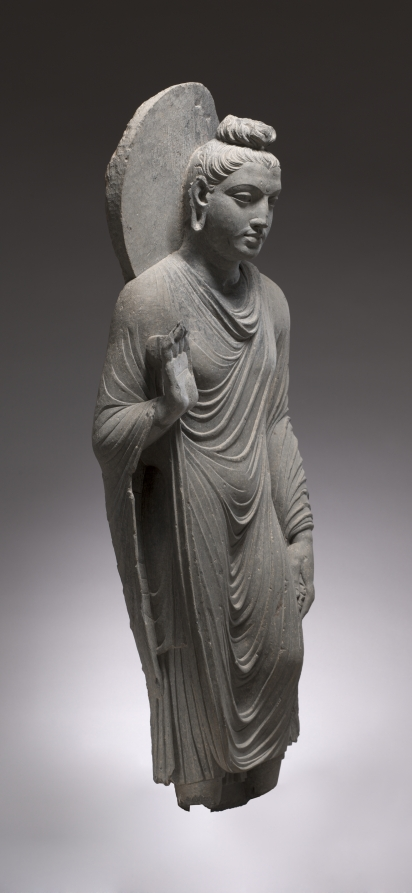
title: Standing Buddha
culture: Pakistan, Gandhara, Kushan period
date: 150–200 CE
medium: schist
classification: Sculpture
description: Combining elements from both the Mediterranean and South Asian worlds, the artists of Gandhara created a new vision of the Buddha during the period of high contact between the two regions from the 100s to 200s AD. They were among the first to show the Buddha with a placid expression, thick wavy hair, and clothed in a heavy, toga-like monk’s robe.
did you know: The cavity at the top of the head may have once held a portion of the Buddha's relics.